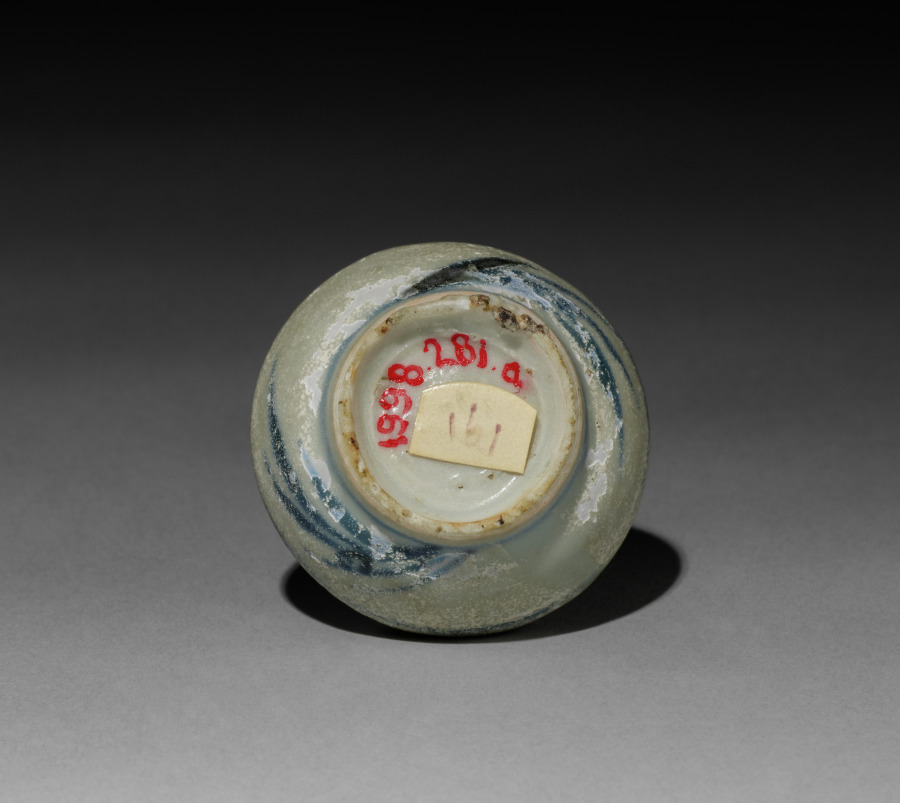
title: Pill Box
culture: China, Qing dynasty (1644-1911)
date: c. 1752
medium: porcelain with blue and white decoration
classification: Ceramic